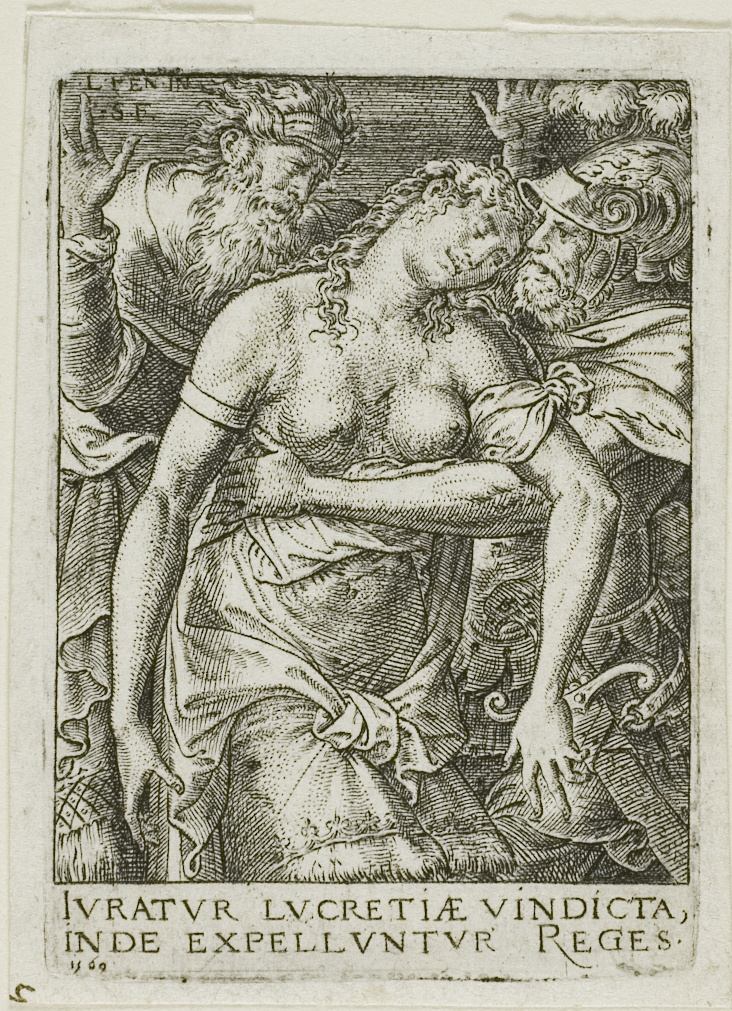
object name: Print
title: Lucretia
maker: Etienne Delaune; French, c. 1519-1583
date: 1569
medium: Engraving on paper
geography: France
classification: engraving; print; prints and drawing